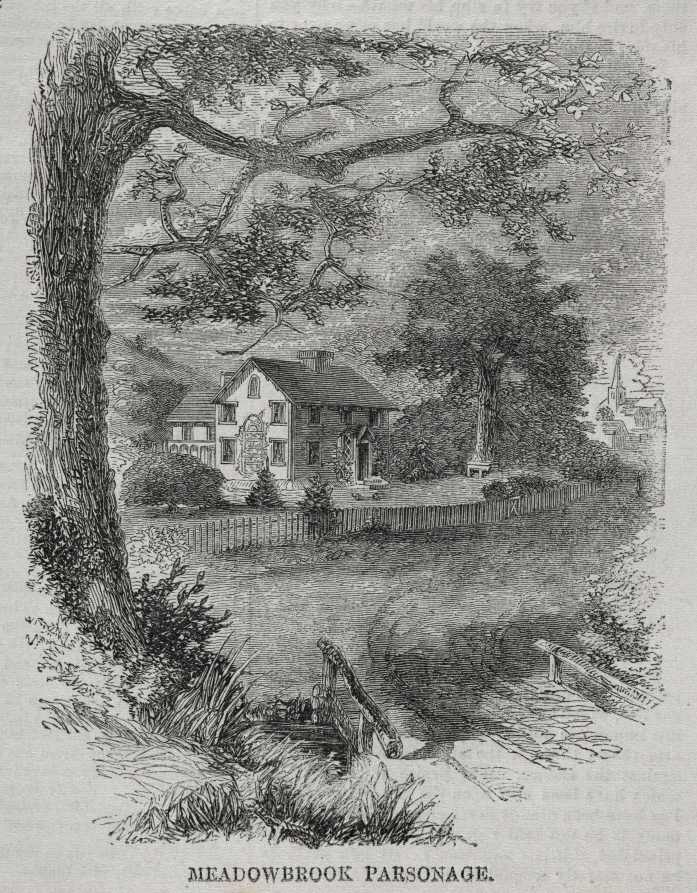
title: Meadowbrook Parsonage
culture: America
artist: Winslow Homer (American, 1836–1910)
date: 1860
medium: wood engraving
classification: Print